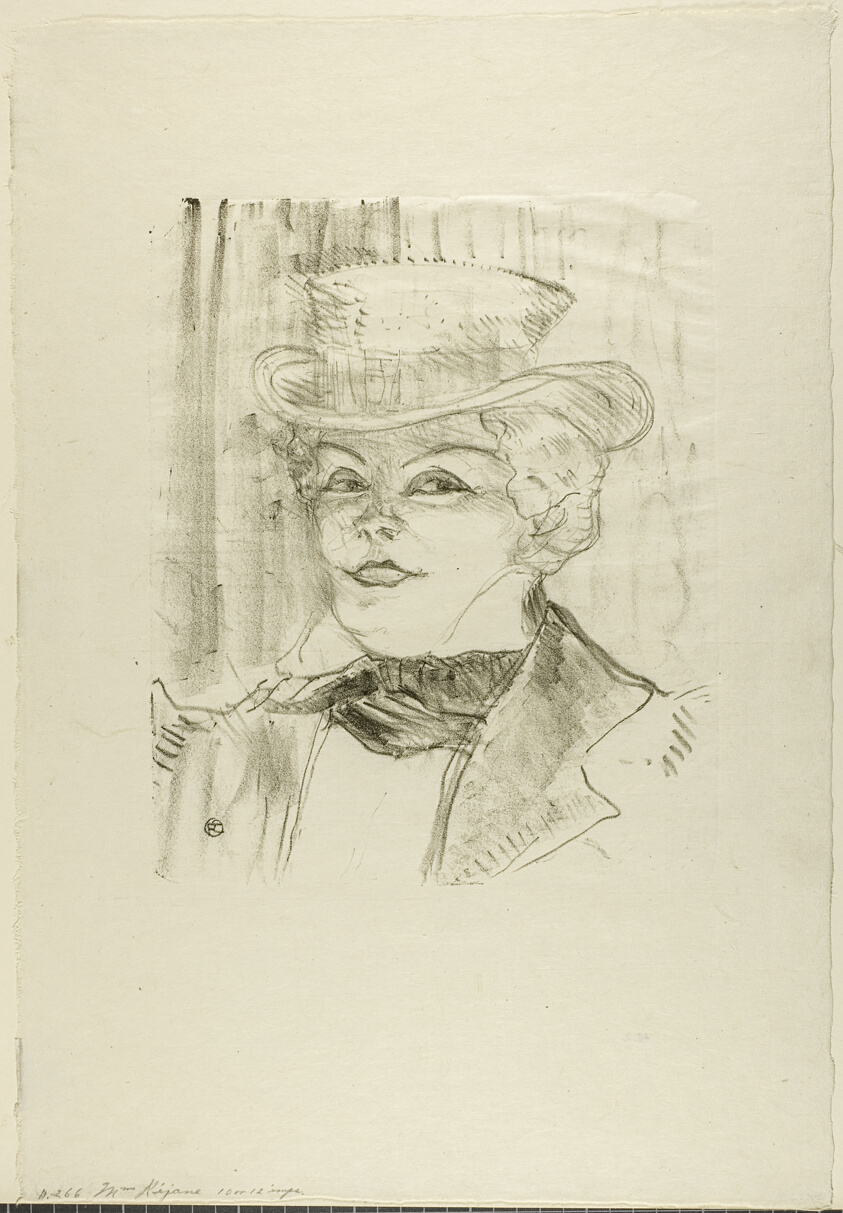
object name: Print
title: Madame Réjane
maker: Henri de Toulouse-Lautrec (French, 1864-1901)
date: 1898, published 1936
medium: Color lithograph on ivory laid paper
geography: France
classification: lithograph; print; prints and drawing